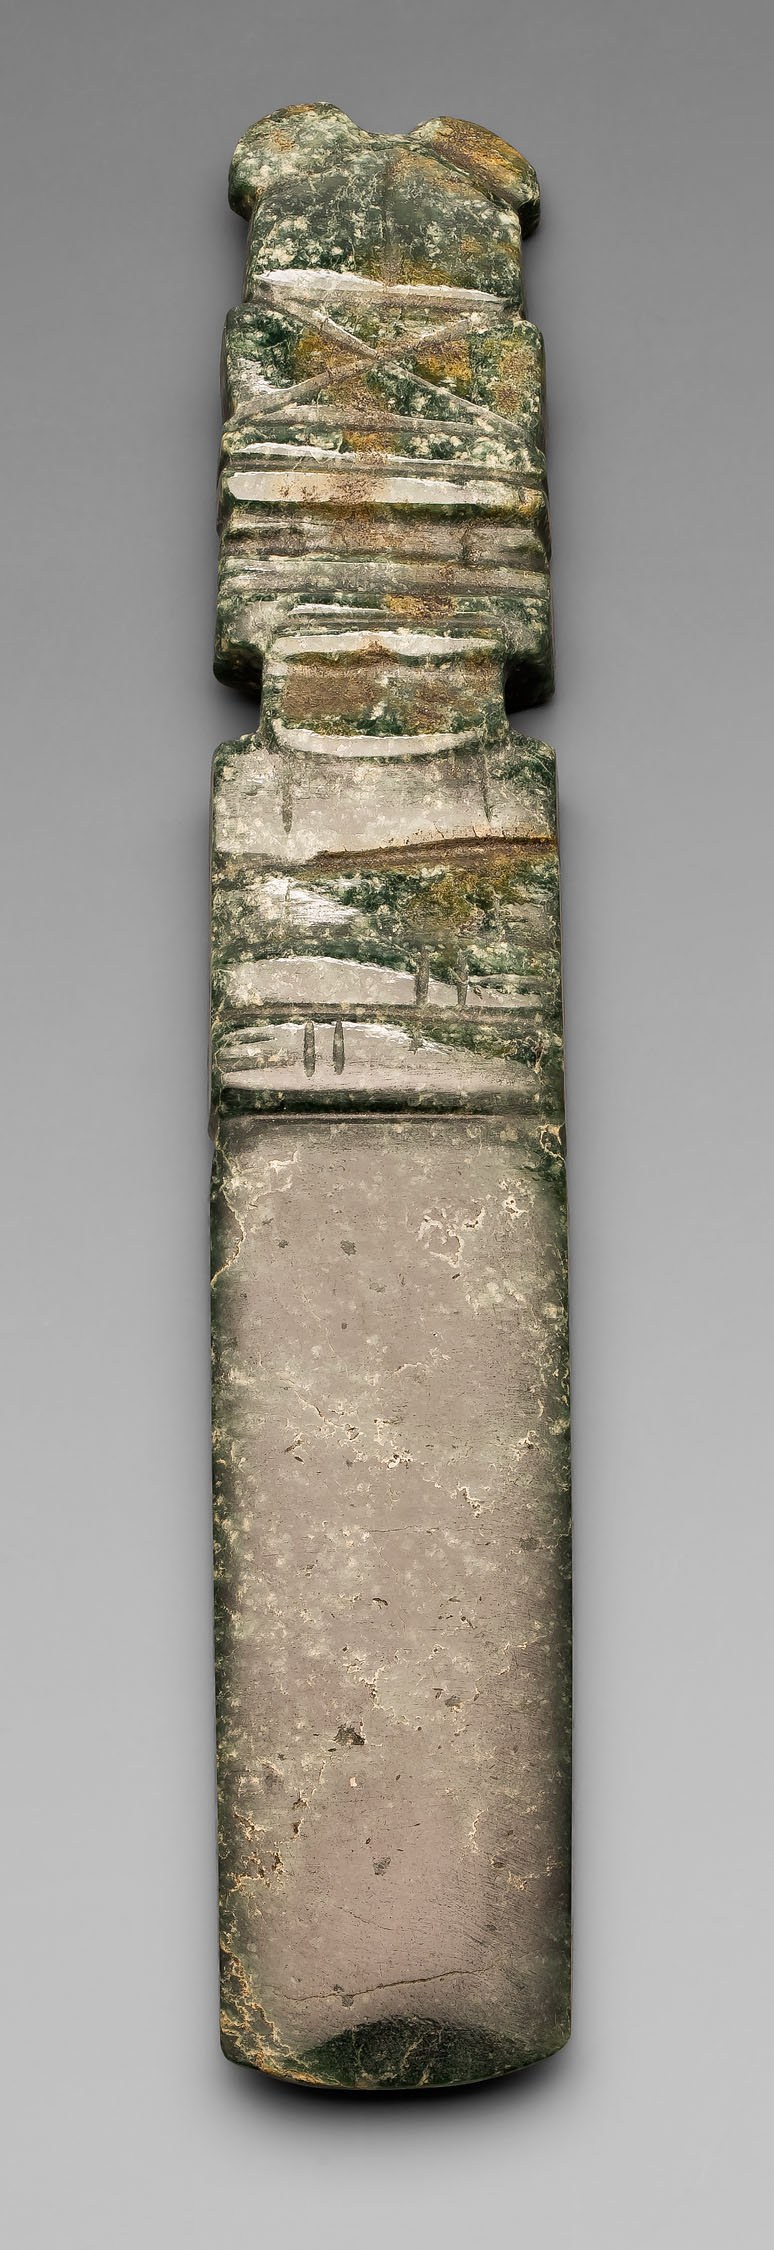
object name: Costume and Accessories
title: Celt Pendant Depicting an Abstract Figure with a Tall Headdress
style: nicoya, americas, lower central america, Arts of the Americas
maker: Nicoya (Nicoya, Guanacaste province, Costa Rica)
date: 1–500 CE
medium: Jade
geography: Nicoya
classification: pendant (jewelry); stone; art of the americas; jewelry; costume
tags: abstract figures, agriculture